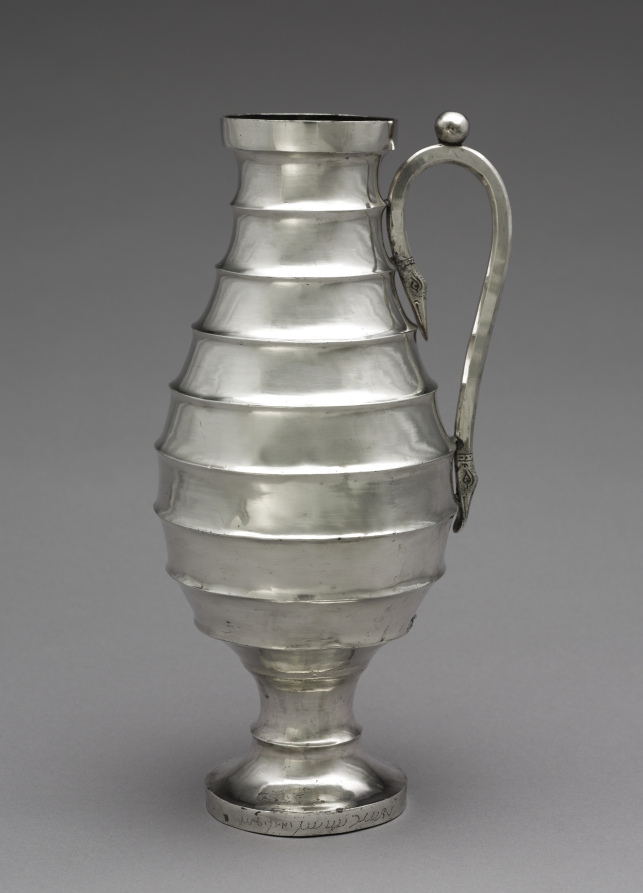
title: Stepped Pitcher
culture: Iran, Sasanian Empire (224–651 CE)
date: 400–600 CE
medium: silver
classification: Metalwork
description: The Sasanians are best known today for their expert work in silver. This museum is fortunate to have one of the most important collections of Sasanian silver vessels in the world.